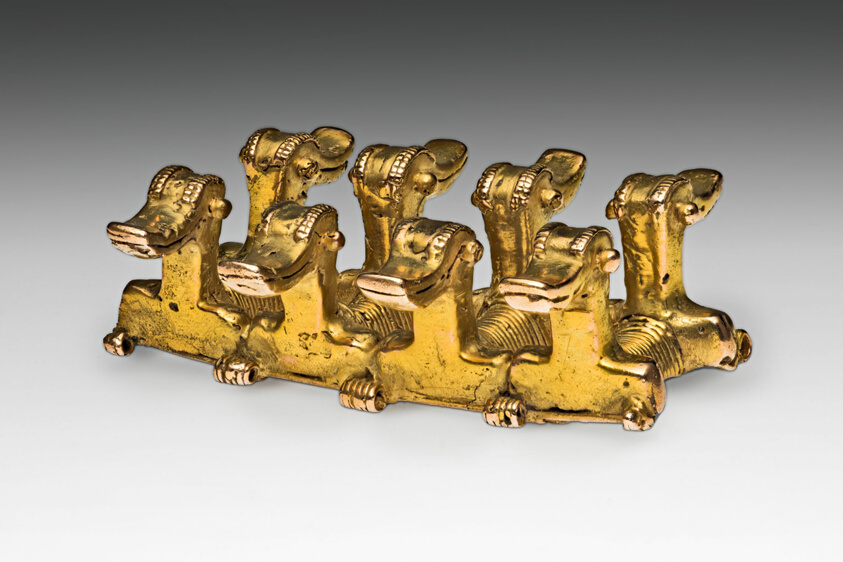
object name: Costume and Accessories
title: Pendant in the Form of Four Double-Headed Figures with Long Beaks, Possibly Ducks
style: coclé, Pre-Columbian, americas, Arts of the Americas, lower central america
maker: Coclé (Venado Beach, Coclé province, Panama)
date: 500–1000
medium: Cast gold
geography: Panama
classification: pendant (jewelry); metal; jewelry; art of the americas; costume